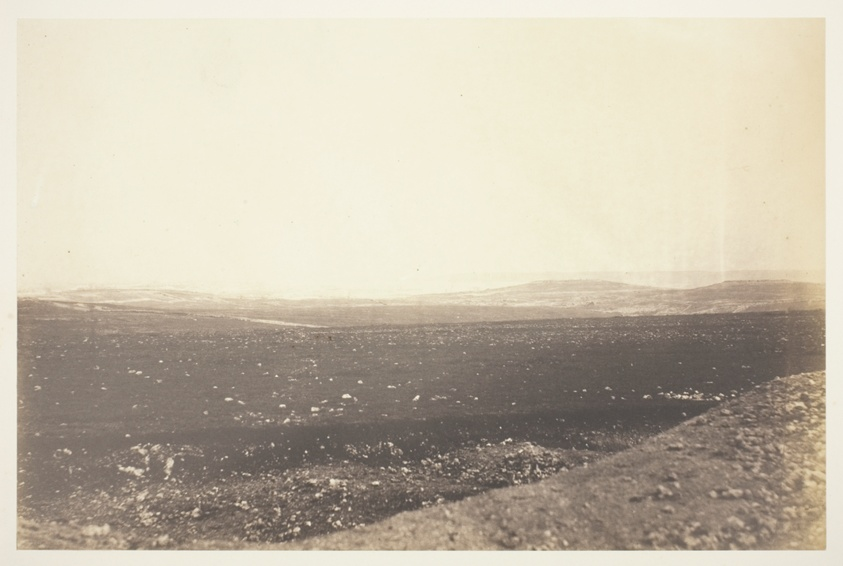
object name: Photograph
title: Sebastopol, from the Mortar Battery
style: 19th century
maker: Roger Fenton (English, 1819–1869)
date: 1855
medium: Salted paper print, from the album "Photographic Pictures of the Seat of War in the Crimea" (1856)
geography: England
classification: salted paper print; photographic process; photography; photograph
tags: Collected by Hugh Edwards